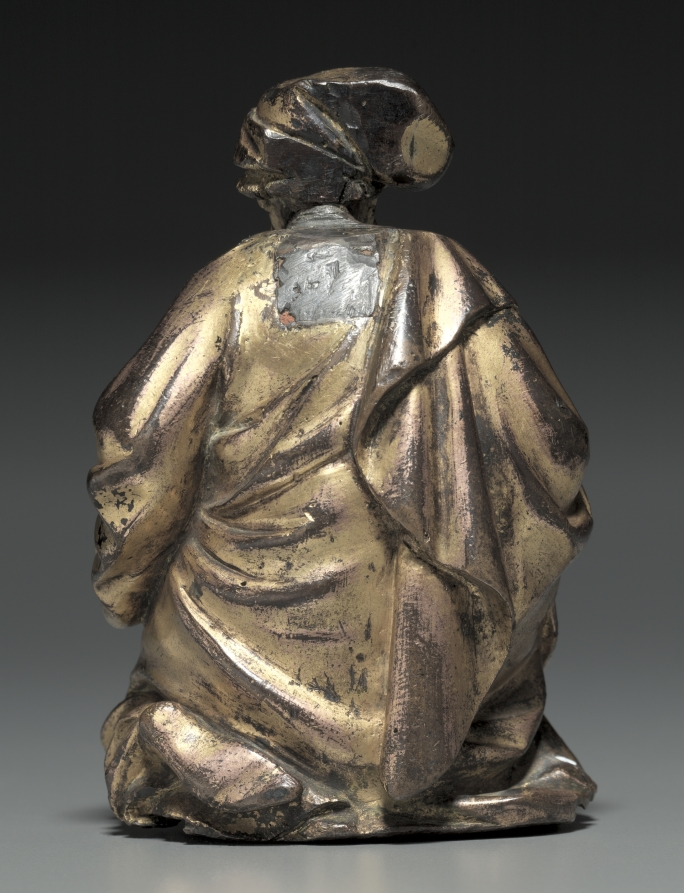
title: Kneeling Prophet from the Reliquary Chasse of Saint-Germain-des-Prés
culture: France, Paris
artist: Jean de Clichy (French)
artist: Gauthier du Four (French)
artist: and Guillaume Boey (French)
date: 1409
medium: gilt bronze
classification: Sculpture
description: This figure is one of only two known surviving fragments of the Reliquary Châsse of Saint-Germain. Fashioned from silver, gold, and precious stones, it was designed to hold the body of the saint. A contract from 1409 gives the names of the commissioned goldsmiths: Jean de Clichy, Gautier du Four, and Guillaume Boey.The reliquary was housed in the ancient Benedictine Abbey of Saint-Germain-des-Prés in Paris and formed the monastery’s great treasure until it was destroyed in the French revolution. The exquisite modeling of the prophet, originally a supporting foot of the reliquary, reveals the sophistication of Paris around 1400.